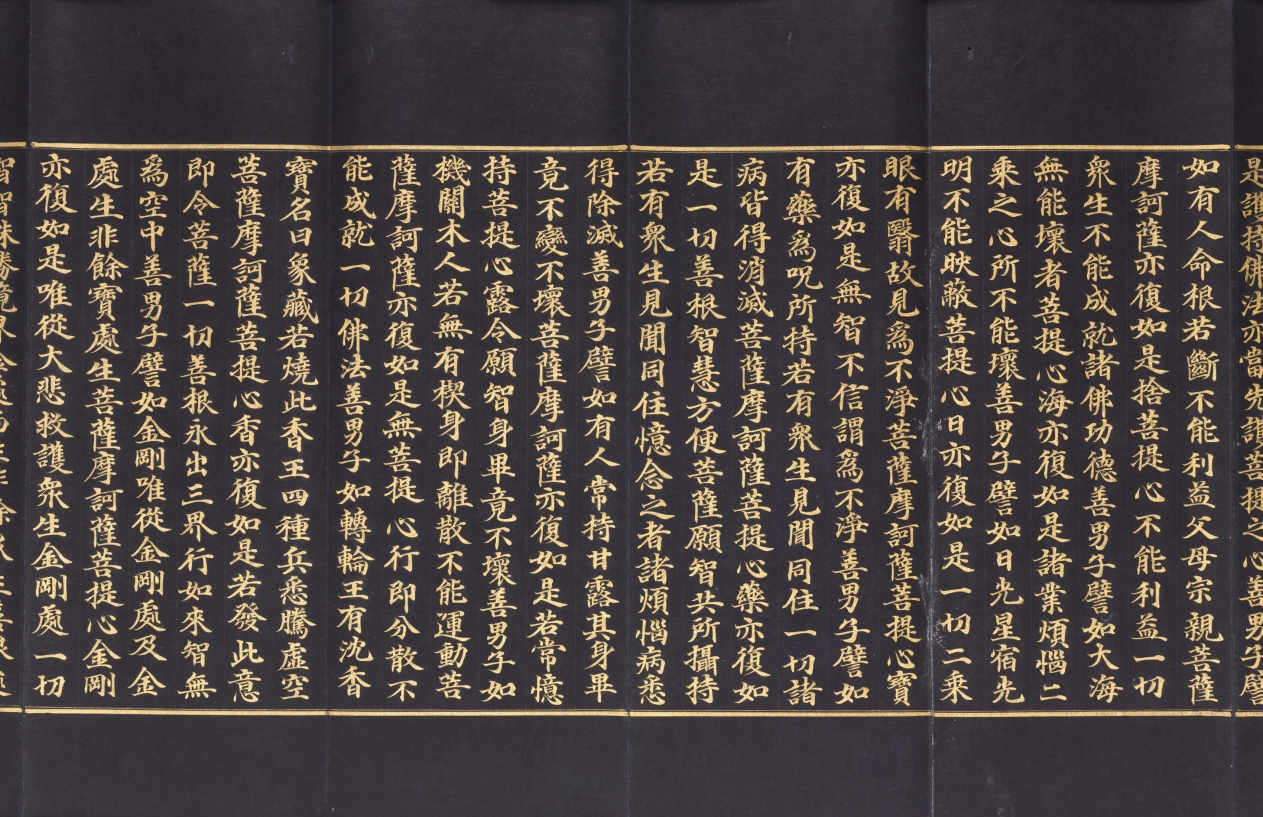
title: Avatamsaka Sutra No. 78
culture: Korea, Goryeo dynasty (918–1392)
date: 1300s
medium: Folded book with illustrated frontispiece; gold and silver on mulberry paper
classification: Bound Volume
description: This illuminated manuscript presents one part of the multivolume sacred text titled Avatamsaka (Flower Garland) sutra. Both the script and the image are rendered in gold ink on the smooth surface of the dark blue, indigo-dyed mulberry paper. This portion of the text, which reads from right to left, describes the encounter of the Buddha of the Future (Maitreya) and the young pilgrim Sudhana. The Buddha gives his words of wisdom to Sudhana, who asks questions about the path toward spiritual awakening. Mixed with ink and glue, the gold has a brilliance that strikingly reflects Sudhana’s ardent quest for understanding the way to reach enlightenment.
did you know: The pristine condition of this manuscript indicates that it was rarely used after its creation, revealing that the act of making a manuscript rather than reading it was the main religious goal.